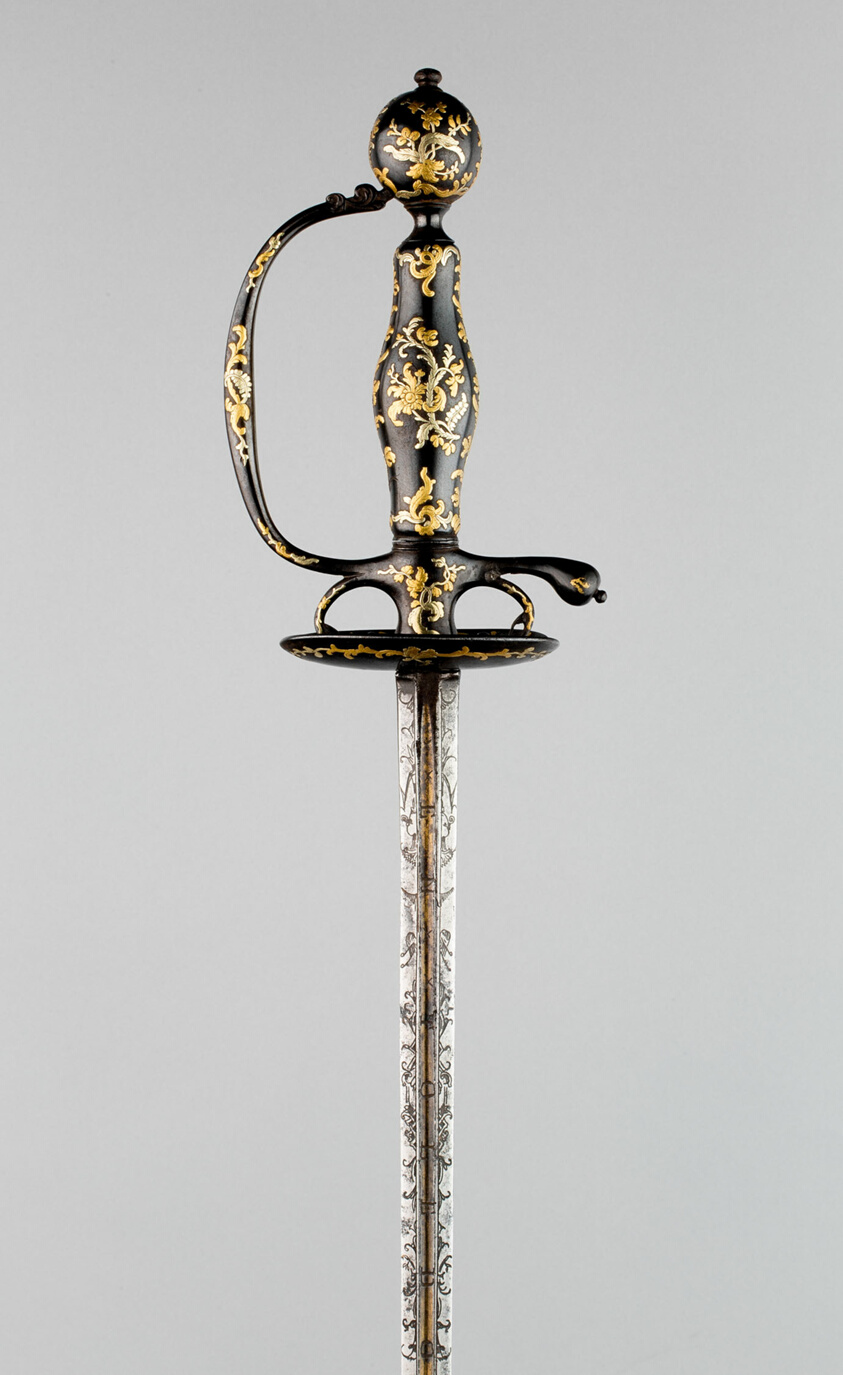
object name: Arms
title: Smallsword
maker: Probably German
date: c. 1760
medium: Steel, two gold alloys, and gilding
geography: Germany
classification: edged weapon-sword; arms; arms and armor